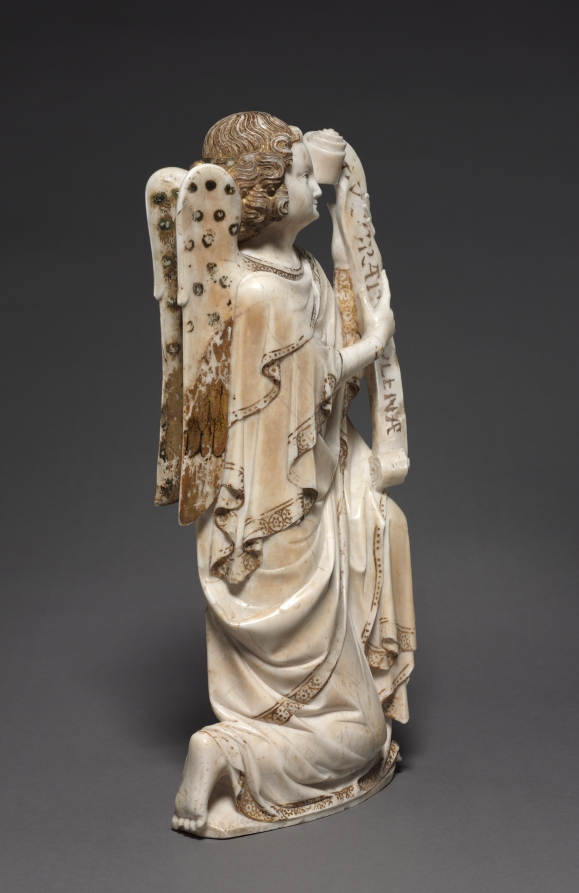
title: The Archangel Gabriel from an Annunciation Group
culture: France, Champagne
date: c. 1350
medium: alabaster with traces of paint and gilding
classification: Sculpture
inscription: Ave Maria, Gratia Plena.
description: In France, the use of alabaster began in the late 1200s for funerary monuments. The Archangel Gabriel, together with its counterpart, the Virgin Mary (now in the Louvre Museum, Paris) is part of an Annunciation. This is a rare example of alabaster sculpture from the 1300s. The alabaster comes from a quarry near Malaucène in Provence (France), making it an instance of long-distance trade of the rare material. Although the figure is very flat, it was likely made to also be viewed from the back, where there are remnants of gilding and the peacock feathers of the angel’s wing.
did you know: The surface of alabaster works can vary. By differentiating the intensity of polishing, it is possible for sculptures to create a surface with varying degrees of luster, or shine.